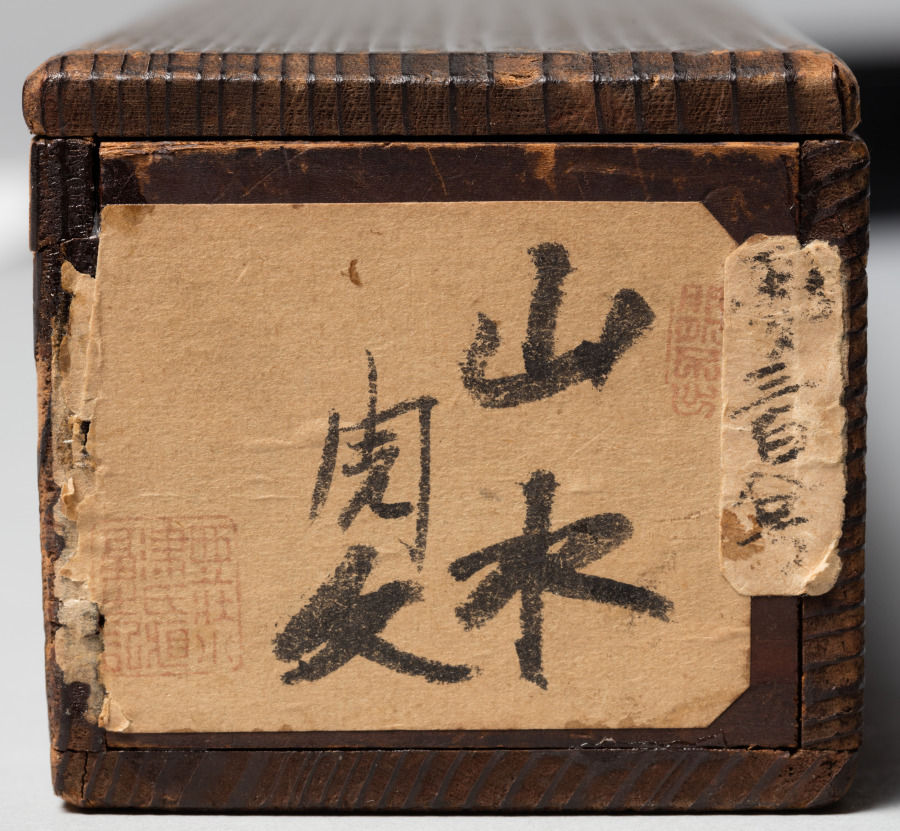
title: Landscape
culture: Japan, Muromachi period (1392–1573)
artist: attributed to Kenkō Shōkei (Japanese, active 1478–1506)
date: late 1400s–early 1500s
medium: hanging scroll, ink and light color on paper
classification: Painting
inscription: inscription above signed Shō'u Kojin; calligraphy by the Shokōji priest Tōgan Zuisen 桃源瑞仙 (1430–89)